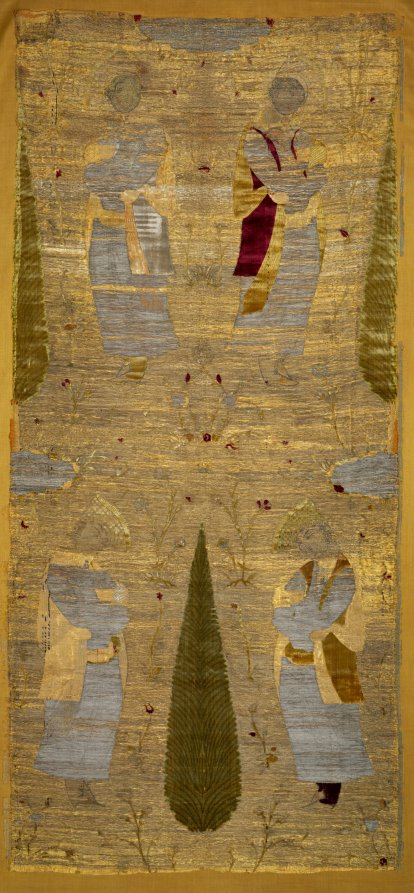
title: Velvet panel with four youths smelling flowers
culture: Iran, Isfahan or Yazd, Safavid period (1501-1722)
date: 1625–50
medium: Silk: velvet, brocaded, and pile-warp substitution; gilt- and silver-metal thread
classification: Velvet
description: A new style depicting single figures with limited modeling and European artistic influence was spearheaded by the Iranian painter Riza ‘Abbasi and adopted by textile designers in sumptuous brocaded velvets. Even with faded colors, this grand length retains ten colors of velvet pile, a feat that Iranian velvet weavers achieved by skillfully replacing colored pile warp during weaving, and thereby creating the most colorful velvets in the world. Elegant youths dominate the simplified outdoor setting here with diminutive cypresses and silver ponds on a ground originally covered with gold thread. Fashionably dressed young men wear wide-brimmed hats, silver robes, stole-like scarves, and knotted sashes that are symbols of status and rank.